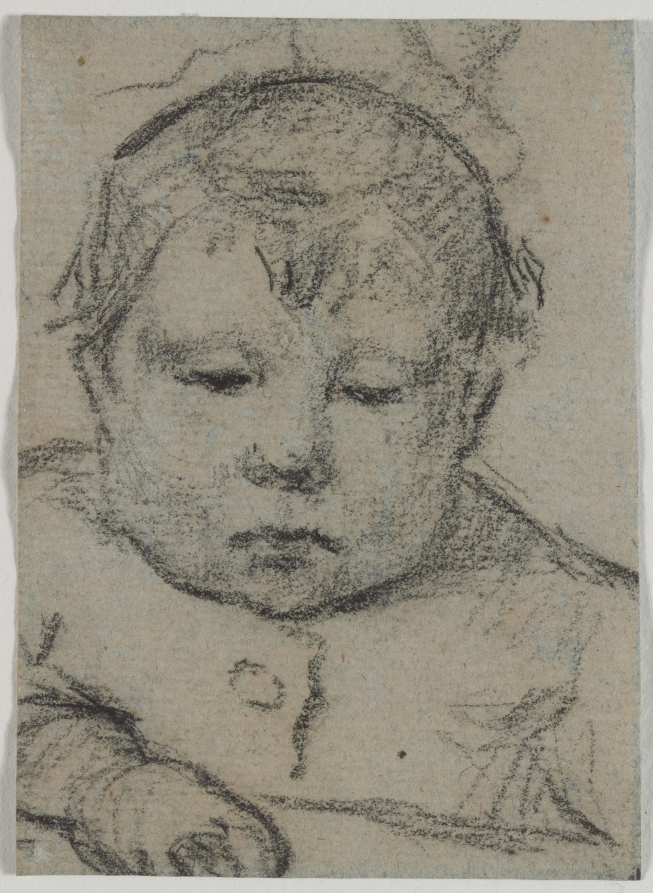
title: Emil Gauguin as a Child, Right Hand Forward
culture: France, 19th century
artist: Paul Gauguin (French, 1848–1903)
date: c. 1875–1876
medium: black crayon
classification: Drawing